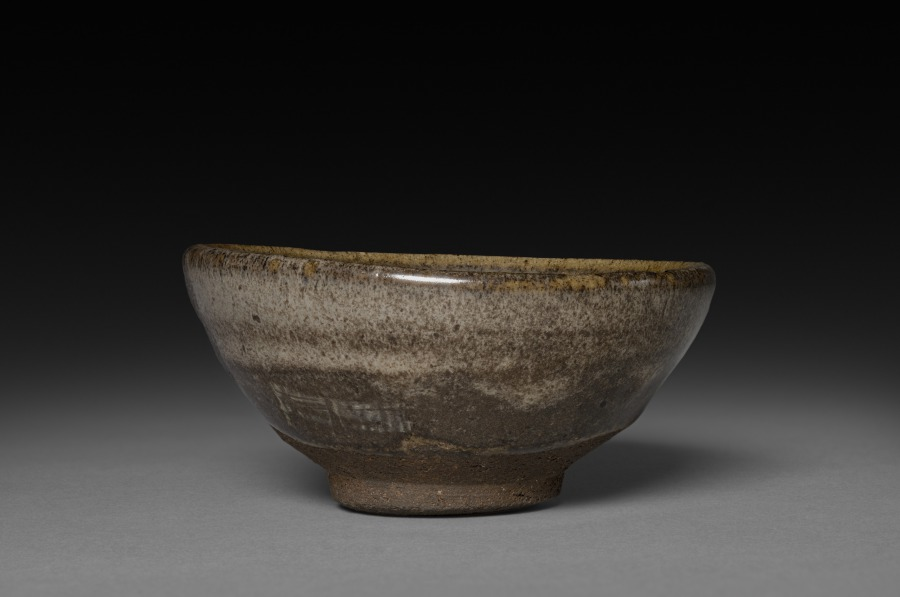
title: Tea Bowl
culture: China, Fujian province, Song dynasty (960-1279)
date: 960–1279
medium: stoneware, Jian ware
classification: Ceramic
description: This brownish-black stoneware tea bowl has rounded sides. Its mottled and blurred green-gray and brown glaze stop short of the foot.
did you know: Jian ware was very popular with the tea cultures in China and Japan.